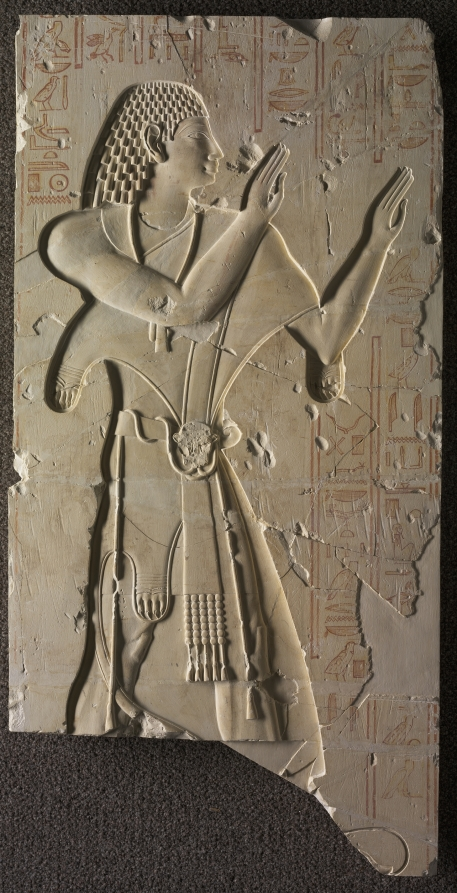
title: Mentuemhat in Ecclesiastical Dress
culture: Egypt, Late period (715–332 BCE), Dynasties 25–26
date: c. 667–647 BCE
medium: limestone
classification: Sculpture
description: Virtually a duplicate of 1951.280. In both reliefs Mentuemhat wears the robes of his office as a high priest of Amen. Here the inscription has been outlined in red by a master draughtsman, but the relief sculptor has not started his work.